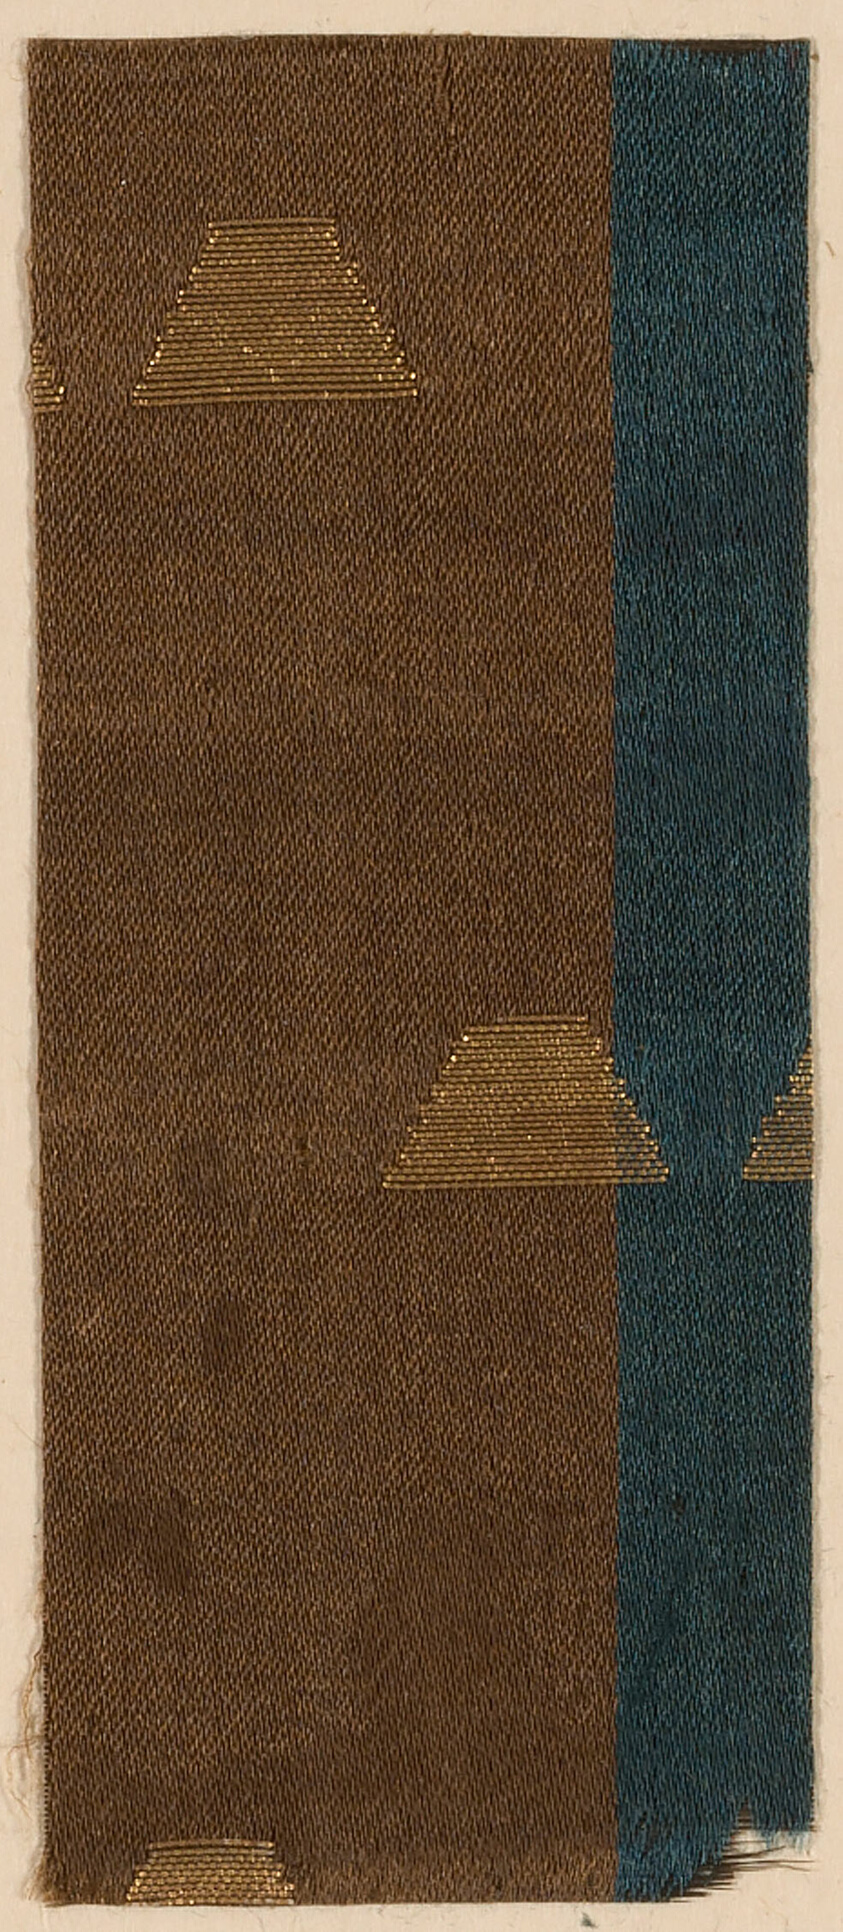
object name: Textile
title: Fragment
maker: Japan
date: Edo period (1615–1868)/Meiji period (1868–1912), 17th/19th century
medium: Plain compound satin, silk & gilt paper; 4 strips to m.m.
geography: Japan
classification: textile; weaving